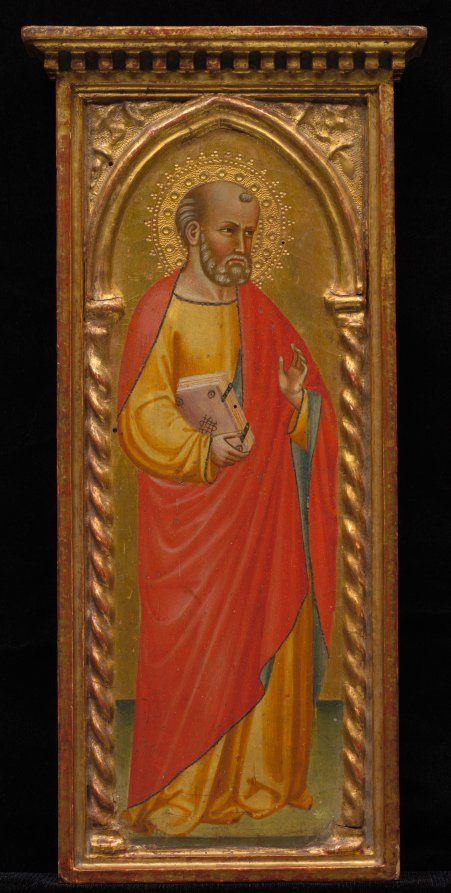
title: Saint in Red Cloak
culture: Italy, late 19th-early 20th century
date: late 19th - early 20th century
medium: tempera on panel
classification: Painting